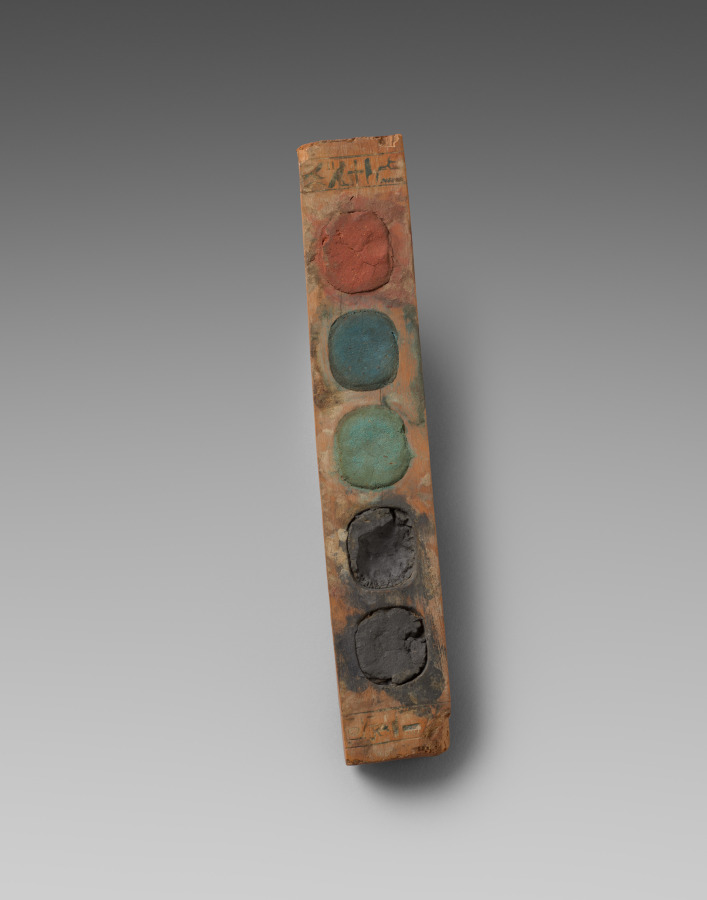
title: Paint Box of Vizier Amenemope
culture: Egypt, New Kingdom (1540–1069 BCE), Dynasty 18, reign of Amenhotep II (1425–1400 BCE)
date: c. 1427–1401 BCE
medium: boxwood with inscription inlaid in Egyptian blue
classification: Implements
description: This paint box still preserves its original cakes of pigment: one cake each of red (red ochre), blue (Egyptian blue), green (a mixture of Egyptian blue, yellow ochre, and orpiment) and two of black (carbon black, from charcoal). It belonged to Amenemope, who was vizier, or prime minister, under Amenhotep II. Amenemope probably used his paint box for recreation.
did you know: Painting was a popular and time-honored pastime among the upper classes in Egypt.